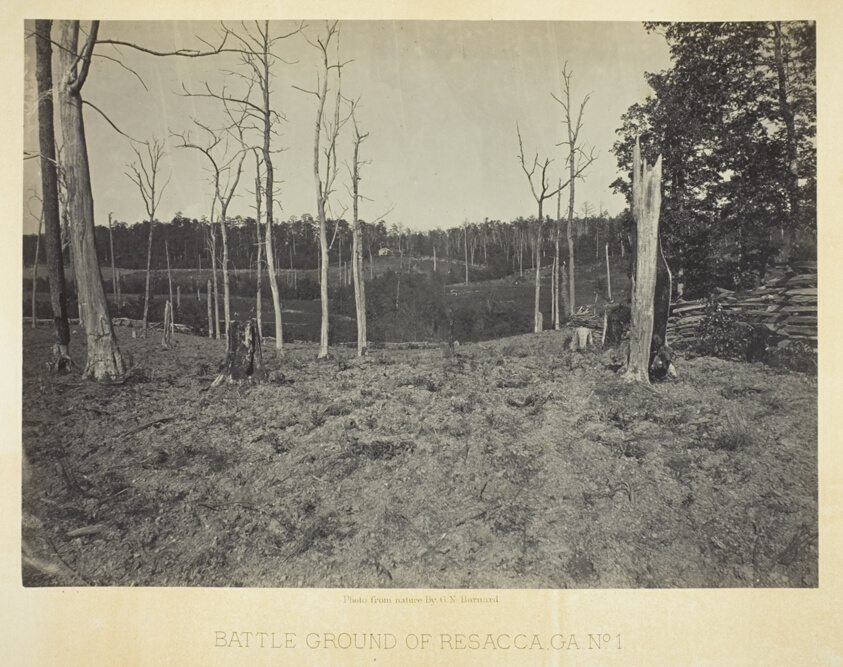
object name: Photograph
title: Battle Ground of Resacca, GA, No. 1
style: 19th century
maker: George N. Barnard (American, 1819-1902)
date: 1866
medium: Albumen print, plate 19 from the album "Photographic Views of the Sherman Campaign" (1866)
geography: United States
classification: albumen silver print; photographic process; photography; photograph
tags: Collected by Hugh Edwards, Sherman's Campaign 1866